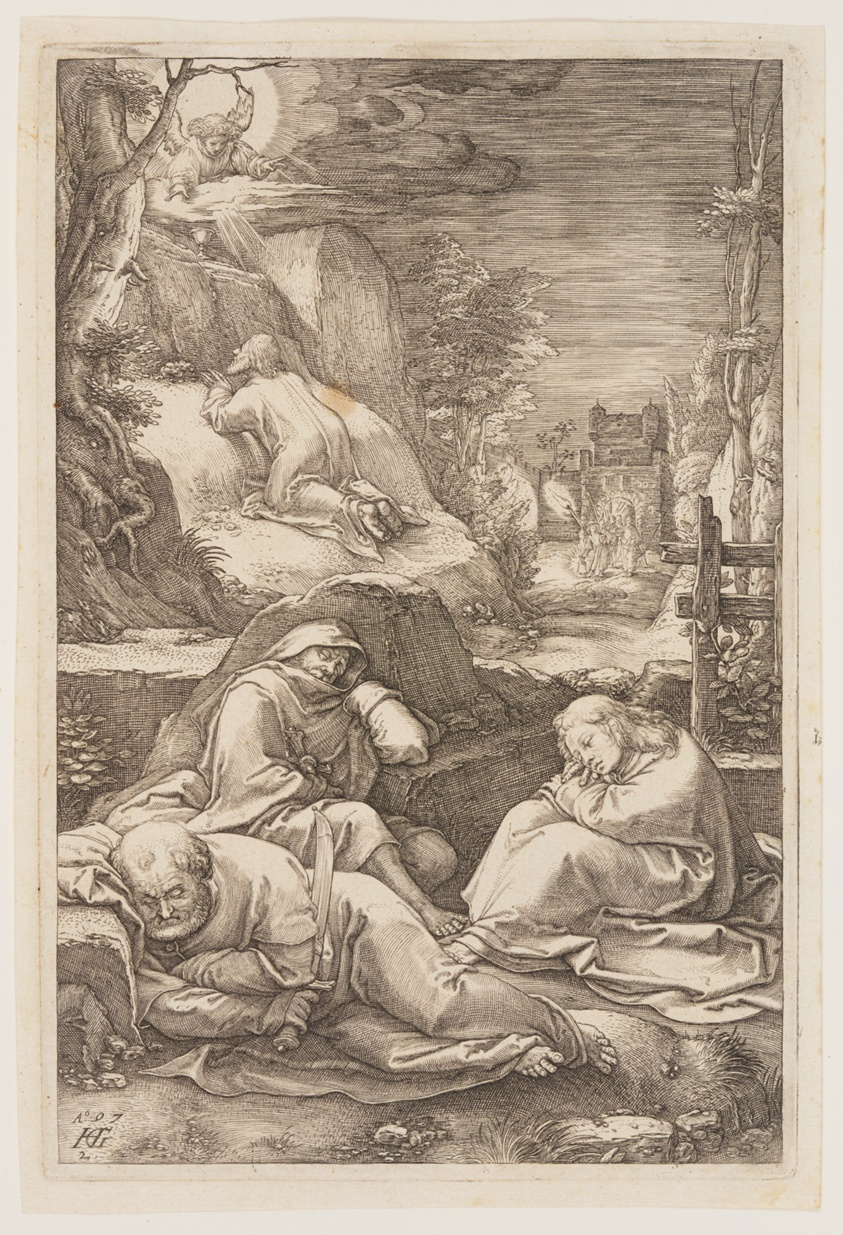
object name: Print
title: Christ on the Mount of Olives, from The Passion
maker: Hendrick Goltzius (Dutch, 1558–1617)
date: 1597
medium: Engraving on ivory laid paper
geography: Netherlands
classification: engraving; paper; print; prints and drawing